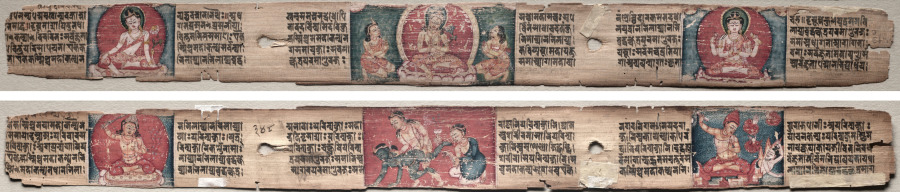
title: Folio 348 from a Gandavyuha-sutra (Scripture of the Supreme Array): Bodhisattva Manjushri with two forms of Avalokiteshvara (recto); Bodhisattva Samantabhadra purifies the path to enlightenment, with Manjushri (verso)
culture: Nepal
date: 1000–1100s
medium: gum tempera and ink on palm leaf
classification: Painting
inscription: >> dharmamukhānyavakrāntānyabhūvan nānānayaiḥ // atha khalu samantabhadro bodhisattvo mahāsattvaḥ sudhanaṃ śreṣṭhidārakametadavocat - dṛṣṭaṃ te kulaputra mama vikurvitam? āha - dṛṣṭamārya / api tu tathāgataḥ prajānan prajānīyāttāvadacintyamidaṃ vikurvitam / so 'vocat - ahaṃ kulaputra anabhilāpyānabhilāpyabuddhakṣetraparamāṇurajaḥsamān kalpān vicaritaḥ sarvajñatācittamabhilaṣamāṇaḥ / ekaikasmiṃśca mahākalpe 'nabhilāpyānabhilāpyabuddhakṣetraparamāṇurajaḥsamāstathāgatā ārāgitā bodhicittaṃ pariśodhayatā / ekaikasmiṃśca mahākalpe sarvatyāgasamāyuktāḥ sarvalokavighuṣṭā mahāyajñā yaṣṭāḥ / sarvasattvapratipādanā sarvajñatāpuṇyasaṃbhāratā / ekaikasmiṃśca mahākalpe anabhilāpyānabhilāpyabuddhakṣetraparamāṇurajaḥsamāstyāgā (Gv 426) mahātyāgāḥ kṛtāḥ, atyarthatyāgāḥ kṛtāḥ sarvajñatādharmānabhiprārthayatā paramāṇurajaḥsamāstathāgatāḥ parameśvarabhūtena satkṛtā gurukṛtā mānitāḥ pūjitāḥ, cīvarapiṇḍapātaśayanāsanaglānapratyayabhaiṣajyapariṣkāraiḥ pratipāditāḥ / teṣāṃ ca asmiṃstathāgatānāṃ śāsane pravrajitā sarvabuddhānuśāsanīṣu pratipannaḥ śāsanaṃ ca me teṣāṃ saṃdhāritam // nābhijānāmi kulaputra tāvadbhiḥ kalpasamudrerekacittotpādamapi tathāgaśāsane vilopamutpādayituṃ nābhijānāmi / tāvadbhiḥ kalpasamudrairekacittotpādamapi pratighasahagatamutpādayitumātmagrahacittaṃ vā ātmagrahaparigrahacittaṃ vā ātmaparanānātvacittaṃ vā bodhimārgavipravāsacittaṃ vā saṃsārasaṃvāsaparikhedacittaṃ vā avalīnacittaṃ vā āvaraṇasaṃmohacittaṃ vā utpādayitumanyatra aparājitajñānaduryodhanagarbhabodhicittāt sarvajñatāsaṃbhāreṣu / iti hi kulaputra sarvakalpasāgarāḥ kṣayaṃ vrajeyuḥ tānnirdiśato ye mama pūrvayogasaṃbuddhakṣetrapariśuddhiprayogāḥ, ye mama mahākaruṇāpratilabdhacittasya sarvaparitrāṇaparipācanapariśodhanaprayogāḥ / evaṃ ye buddhapūjopasthānaprayogāḥ, ye saddharmaparyeṣṭihetorguruśuśrūṣāprayogāḥ, ye saddharmaparigrahahetorātmabhāvaparityāgaprayogāḥ, ye saddharmārakṣaṇanidānāḥ svajīvitaparityāgaprayogāḥ, tāvadbhyo me kulaputra dharmasamudrebhyo na kiṃcidekapadavyañjanamapi yanna cakravartirājyaparityāgena krītam, yannāsti sarvāstiparityāgena krītaṃ sarvasattvaparitrāṇaprayuktena svasaṃtaticittanidhyaptiprayuktena abhimukhaparadharmasaṃprāpaṇaprayuktena sarvalaukikajñānālokaprabhāvanāprayuktena sarvalokottarajñānaprabhāvanāprayuktena sarvasattvasaṃsārasukhasaṃjananaprayuktena sarvatathāgataguṇasaṃvarṇanaguṇaprayuktena / evamanabhilāpyānabhilāpyabuddhakṣetraparamāṇurajaḥsamāḥ kalpasāgarāḥ kṣayaṃ vrajeyurmama svapūrvayogasaṃpadaṃ nirdiśataḥ // tena mayā kulaputra anena evaṃrūpeṇa saṃbhārabalena mūlahetūpacayabalena udārādhimuktibalena guṇapratipattibalena sarvadharmayathāvannidhyaptibalena prajñācakṣurbalena tathāgatādhiṣṭhānabalena mahāpraṇidhānabalena mahākaruṇābalena supariśodhitābhijñābalena kalyāṇamitraparigrahabalena atyantapariśuddho dharmakāyaḥ pratilabdhaḥ sarvatryadhvāsaṃbhinnaḥ / anuttaraśca rūpakāyaḥ pariśodhitaḥ (Gv 427) sarvalokābhudgataḥ sarvajagadyathāśayavijñapanaḥ sarvatrānugataḥ sarvabuddhakṣetraprasṛtaḥ samantapratiṣṭhānaḥ sarvataḥ sarvavikurvitasaṃdarśanaḥ sarvajagadabhilakṣaṇīyaḥ / prekṣasva kulaputra imāmātmabhāvapratilābhasaṃpadamanantakalpasāgarasaṃbhūtāṃ bahukalpakoṭīniyutaśatasahasradurlabhaprādurbhāvāṃ durlabhasaṃdarśanām / nāhaṃ kulaputra anavaropitakuśalamūlānāṃ sattvānāṃ śravaṇapathamapyāgacchāmi prāgeva darśanam / santi kulaputra sattvāḥ, ye mama nāmadheyaśravaṇamātreṇa avaivartikā bhavantyanuttarāyāṃ samyaksaṃbodhau / santi darśanamātreṇa, santi sparśanamātreṇa, santyanuvrajanamātreṇa, santyanubandhanamātreṇa, santi svapnadarśanena, santi svapne nāmadheyaśravaṇena avaivartikā bhavantyanuttarāyāṃ samyaksaṃbodhau / kecitsattvā māmekarātriṃdivasamanusmaramāṇāḥ paripākaṃ gacchanti / kecidardhamāsaṃ kecinmāsaṃ kecidvarṣaṃ kecidvarṣaśataṃ kecitkalpaṃ kecitkalpaśataṃ kecidyāvadanabhilāpyānabhilāpyabuddhakṣetraparamāṇurajaḥsamān kalpān māmanusmaramāṇāḥ paripākaṃ gacchanti / kecidekajātyā paripākaṃ gacchanti māmanusmaramāṇāḥ / kecijjātiśatena, kecidyāvadanabhilāpyānabhilāpyabuddhakṣetraparamāṇurajaḥsamairjātiparivartaiḥ / kecitsattvā mama prabhādarśanena paripākaṃ gacchanti / kecidraśmipramokṣasaṃdarśanena, kecitkṣetraprakampanena, kecidrūpakāyasaṃdarśanena, kecitsaṃpraharṣaṇena paripākaṃ gacchanti / iti hi kulaputra buddhākṣetraparamāṇurajaḥsamairupāyaiḥ sattvā avaivartikā bhavantyanuttarāyāṃ samyaksaṃbodhau / ye khalu punaḥ kulaputra sattvā mama buddhakṣetrapariśuddhiṃ śṛṇvanti, te pariśuddheṣu buddhākṣetreṣūpapadyante / ye mamātmabhāvapariśuddhiṃ paśyanti, te mamātmabhāve upapadyante / paśya kulaputra imāṃ mamātmabhāvapariśuddhim //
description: This leaf has six paintings, three on the recto and three on the verso, creating part of a visual grand finale. The first 340 leaves of the manuscript mainly have a single painting, but at the end there are more, and they depict varied and sometimes aggressive imagery. Similarly, the text ends with a hymn, the Buddhisattva vow to clear the path to enlightenment of evil obstacles, such as wrong views and bad influences.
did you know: The same Bodhisattva of Wisdom, Manjushri, is slim and splendid on the front in the middle, portly and protective on the back at the left.